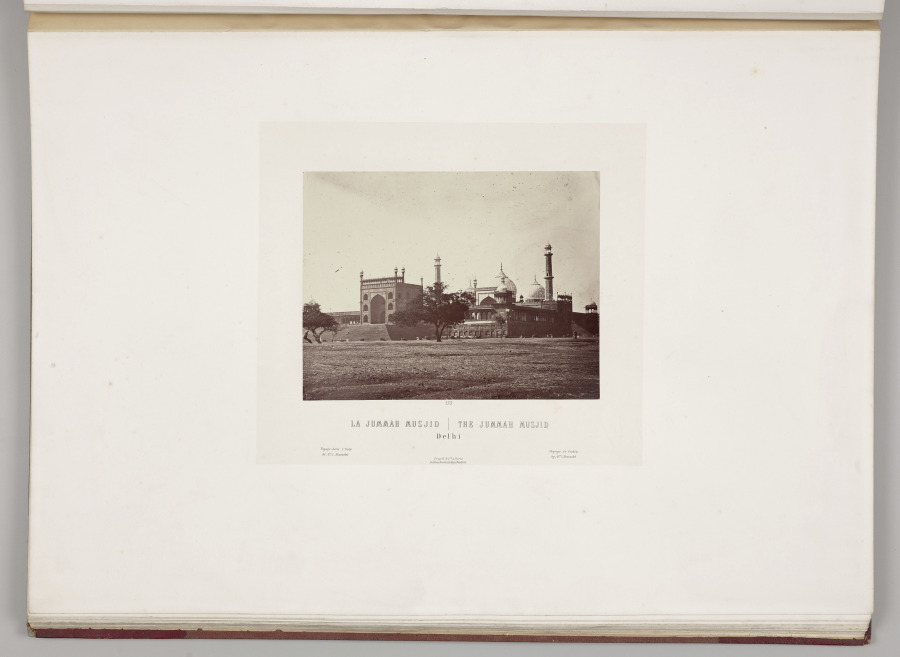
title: The Jummah Musjid, Delhi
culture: France, 19th century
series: India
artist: Louis-Théophile Marie Rousselet (French, 1845–1929)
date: 1865–68, published 1869–70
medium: Albumen print from glass plate negative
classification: Photograph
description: Concerned that his drawings did not do justice to the splendor of India’s monuments, Rousselet learned photography in India that year, a remarkable accomplishment. He proved to be a talented photographer with a sophisticated sense of composition. The scenes in this volume sweep across sites of Sultanate, Rajput, and Mughal power in northern India, from the sacred Hindu city of Varanasi on the Ganges River to Alwar in Rajasthan. Also included are several scenes of industry and portraits of Indian rulers.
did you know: Louis Rousselet described himself as a “scientific traveler” when he went to India alone at age 18 in 1863 and stayed into 1868